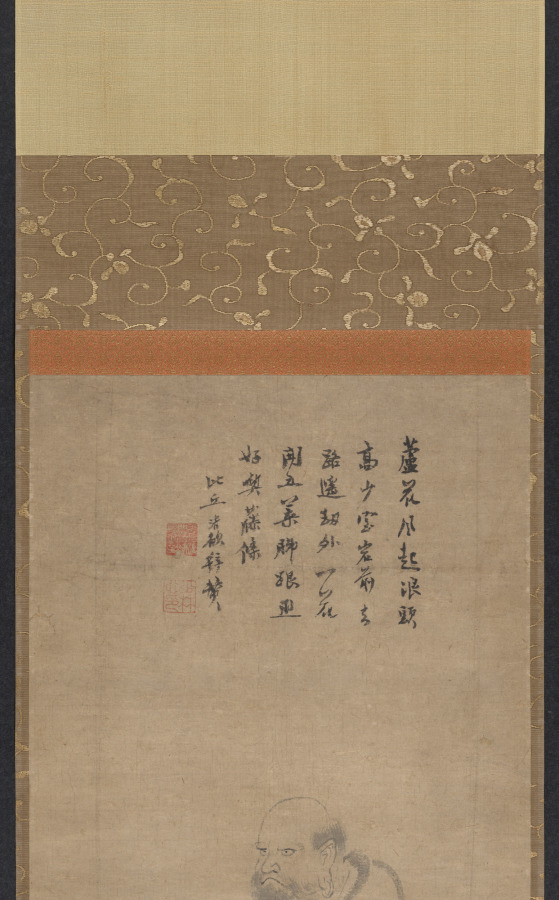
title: Bodhidharma Crossing the Yangzi on a Reed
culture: China, Yuan dynasty (1271-1368)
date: 1300s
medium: hanging scroll; ink on paper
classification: Painting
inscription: 蘆花風起浪頭高，少室岩前去路遙。/ 劫外一花開五葉，腳跟正好喫藤條。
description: Chan Buddhism was introduced to China in the early 500s by the Indian monk Bodhidharma, or Puti Damo (died before 534). Upon his arrival in China, Bodhidharma was allegedly granted an audience with the Liang dynasty emperor Wu (reigned 502–49). Realizing the emperor did not understand his mission, the monk left Nanjing, crossed the Yangzi on a reed, and settled north in Henan province’s Shaolin monastery. Here, Bodhidharma is sketched in few pale brushstrokes. The diluted and swift lines on an empty ground emphasize the Chan idea that all things are illusionary. The inscription reads: Wind rises from the reed flowers, the waves are high; It’s a long way to go beyond the cliff of the Shaoshi mountain; Above the worlds of kalpas a flower is opening into five petals; So that your barefoot heels are just fine for the whipping rattans. —translated by Wai-Kam Ho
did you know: Barefooted Bodhidharma sails across the Yangzi River balanced on a thin stalk of reed.